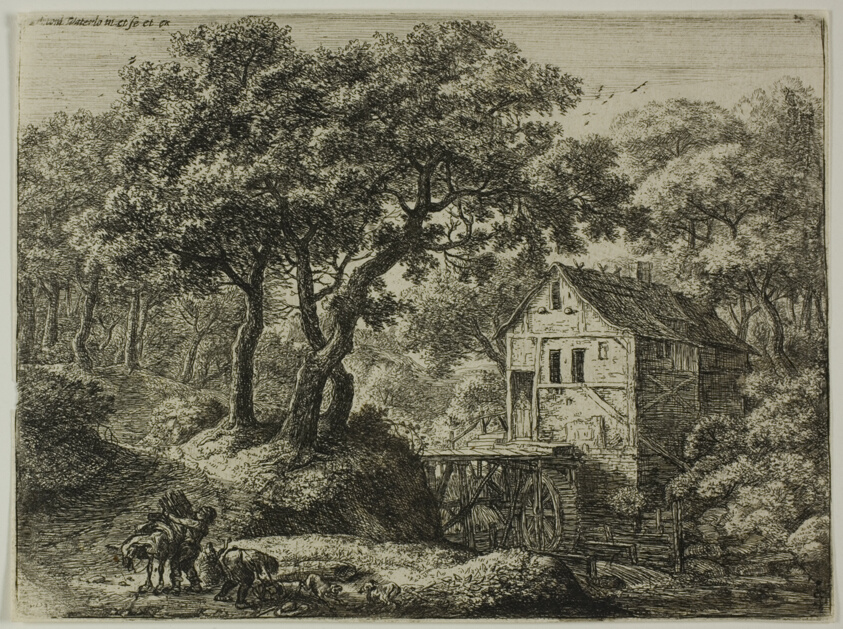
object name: Print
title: The Mill in the Wood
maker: Anthonie Waterloo (Dutch, c. 1610-1690)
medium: Etching on paper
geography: Holland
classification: etching; print; prints and drawing